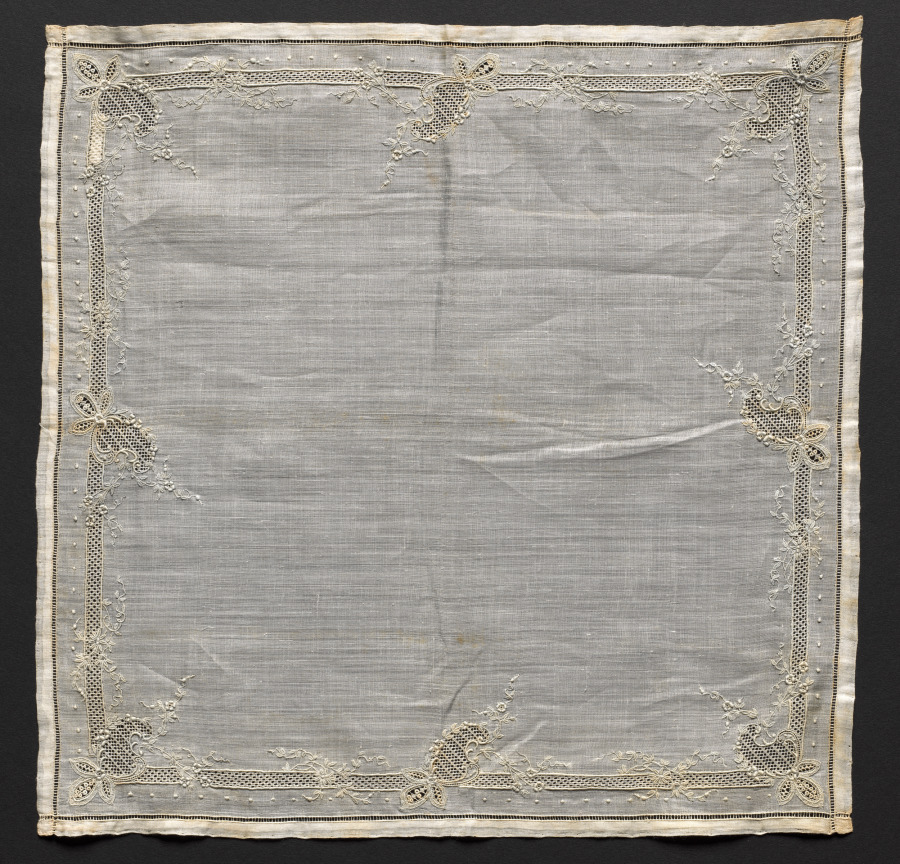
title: Lace Handkerchief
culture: Switzerland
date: 1900–1930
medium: Plain weave linen: needle lace (drawn work) and embroidery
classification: Embroidery